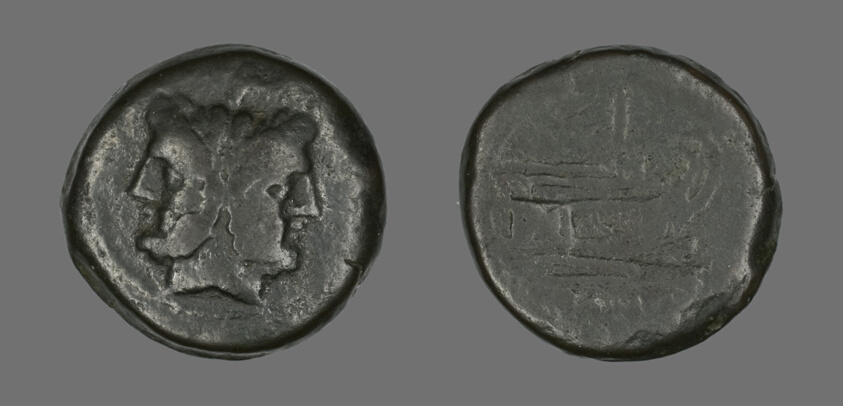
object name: Coin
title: Coin Depicting a Janiform head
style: republic period, roman (ancient, style or period), ancient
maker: Roman, minted in Rome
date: 211-208 BCE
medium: Bronze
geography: Roman Empire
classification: coin; ancient art; struck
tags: mythological figures